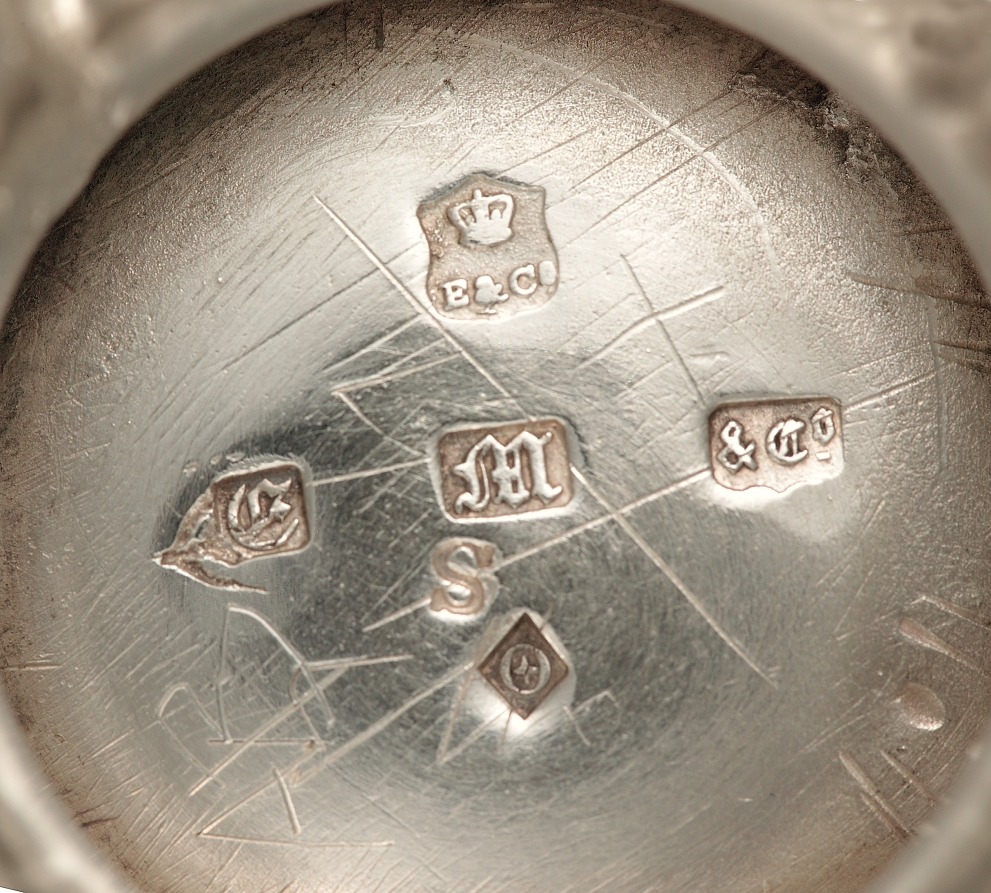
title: Neo-Rococo Coffee Pot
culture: England, 19th century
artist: Elkington & Co. (British)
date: c. 1850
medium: silver and ivory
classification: Silver